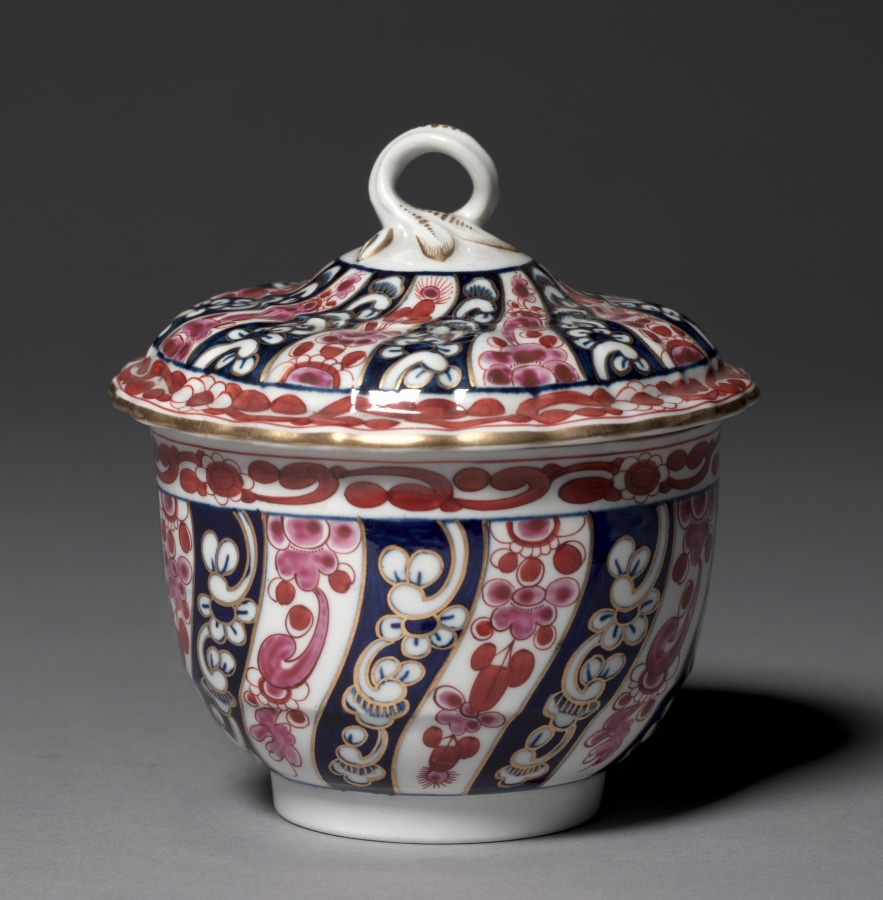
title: Covered Bowl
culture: England, 18th century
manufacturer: Worcester Porcelain Factory (British, established 1751)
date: c. 1770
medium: porcelain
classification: Ceramic